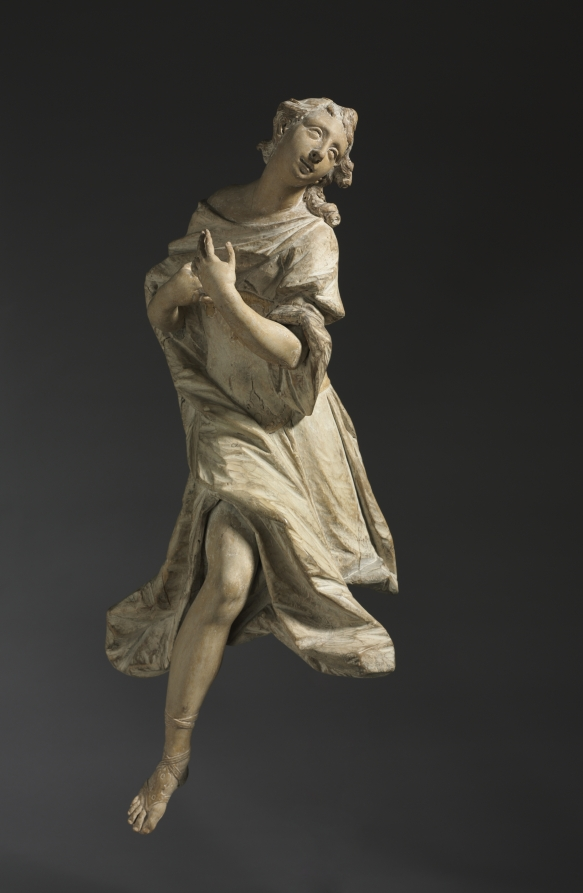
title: Kneeling Angel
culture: Germany, Munich, 18th century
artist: Ignaz Günther (German, 1725–1775)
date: c. 1760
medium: gessoed and painted wood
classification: Sculpture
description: This angel, and another now in the Philadelphia Museum of Art, were probably originally placed on either side of a tabernacle—a structure designed to hold the consecrated bread and wine of the Eucharist—on an altar in a Christian church or private chapel. The angels would originally have had wings, and the now plain surface of the sculpture would have been painted or gilded. Ignaz Günther was among the most sought-after carvers of religious sculpture in southern Germany. His virtuoso skill is particularly evident here in the angel’s pious expression and elegantly formed hands and feet.